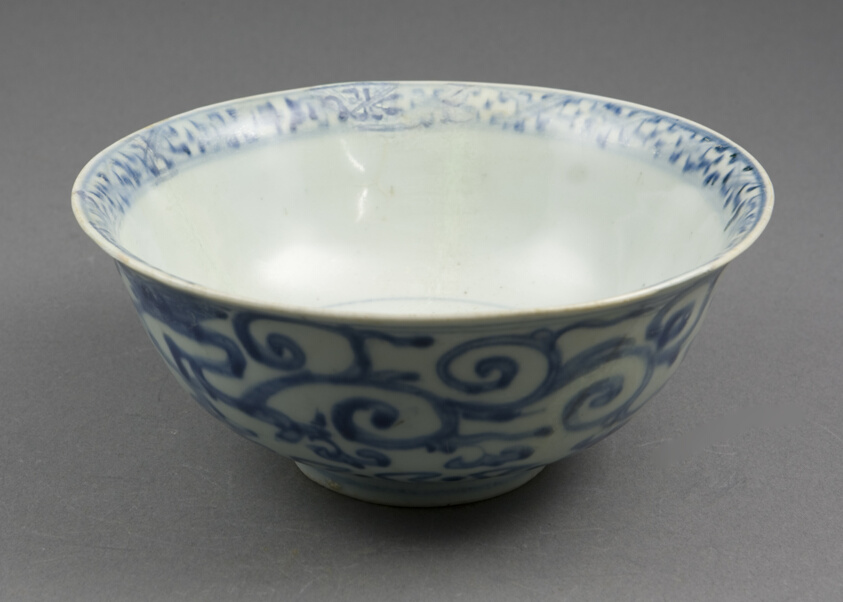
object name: Vessel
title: Bowl with Everted Rim and Scrollwork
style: annamese, vietnamese, Southeast Asian, asian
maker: Vietnam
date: 15th century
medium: Glazed stoneware with cobalt-blue underglaze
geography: Vietnam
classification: ceramics; asian art; vessel